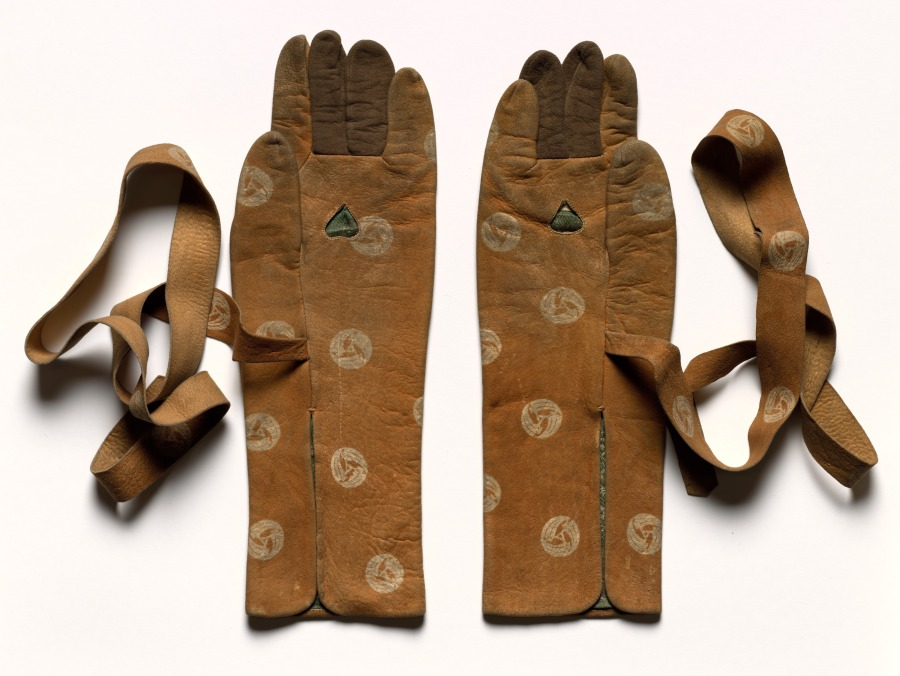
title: Pair of Archer's Gloves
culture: Japan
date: 1800s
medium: chamois leather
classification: Garment